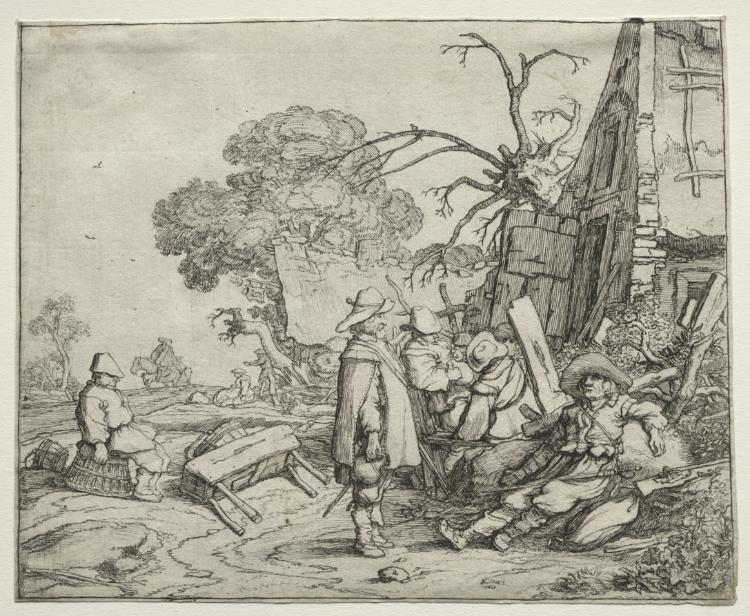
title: Landscape with Soldiers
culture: Netherlands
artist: Pieter Molyn (Dutch, 1595–1661)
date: 1626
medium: etching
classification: Print